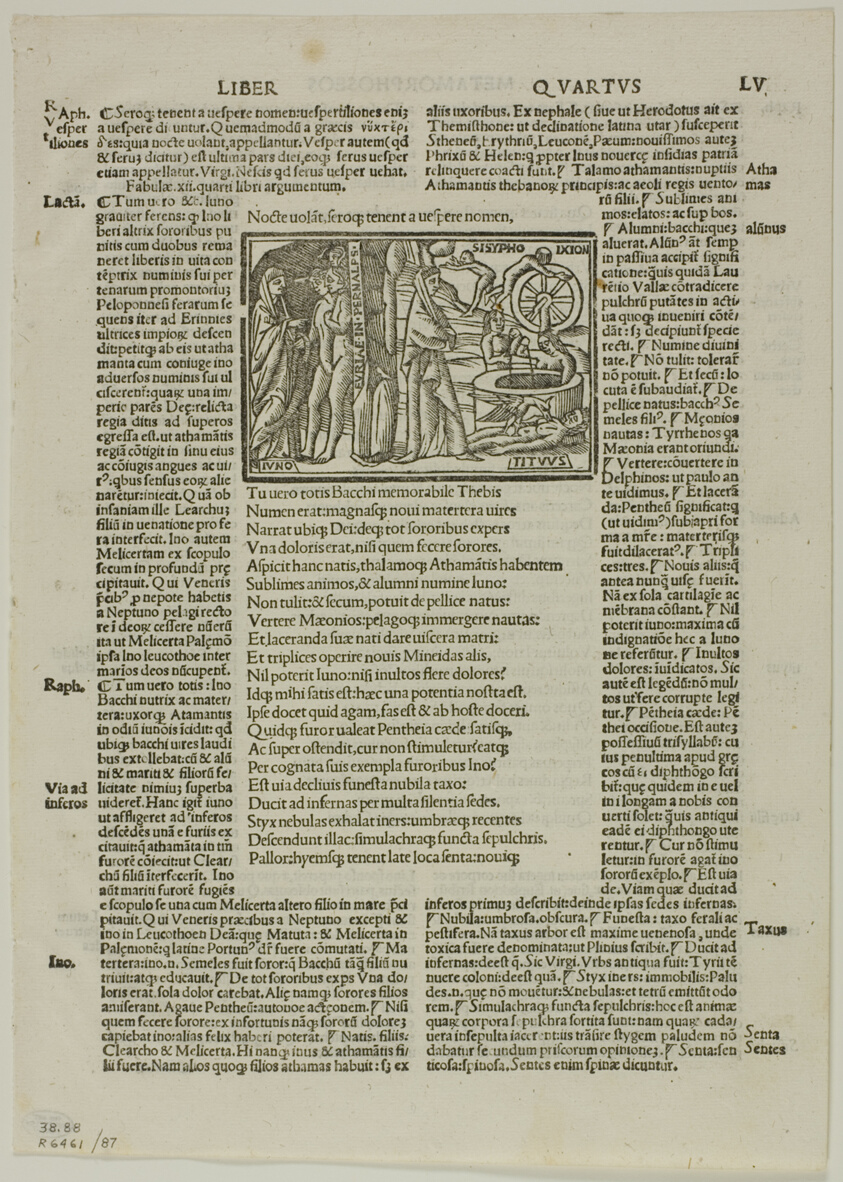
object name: Print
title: Juno in Hades from P. Ouidij Nasonis poete ingeniosissimi Metamorphoseos Libri, plate 87 from Woodcuts from Books of the XVI Century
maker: Unknown Artist (Italian, 16th century); assembled by Max Geisberg (Swiss, 1875-1943)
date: 1527, assembled into portfolio 1937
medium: Woodcut on paper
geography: Italy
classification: woodcut; print; prints and drawing